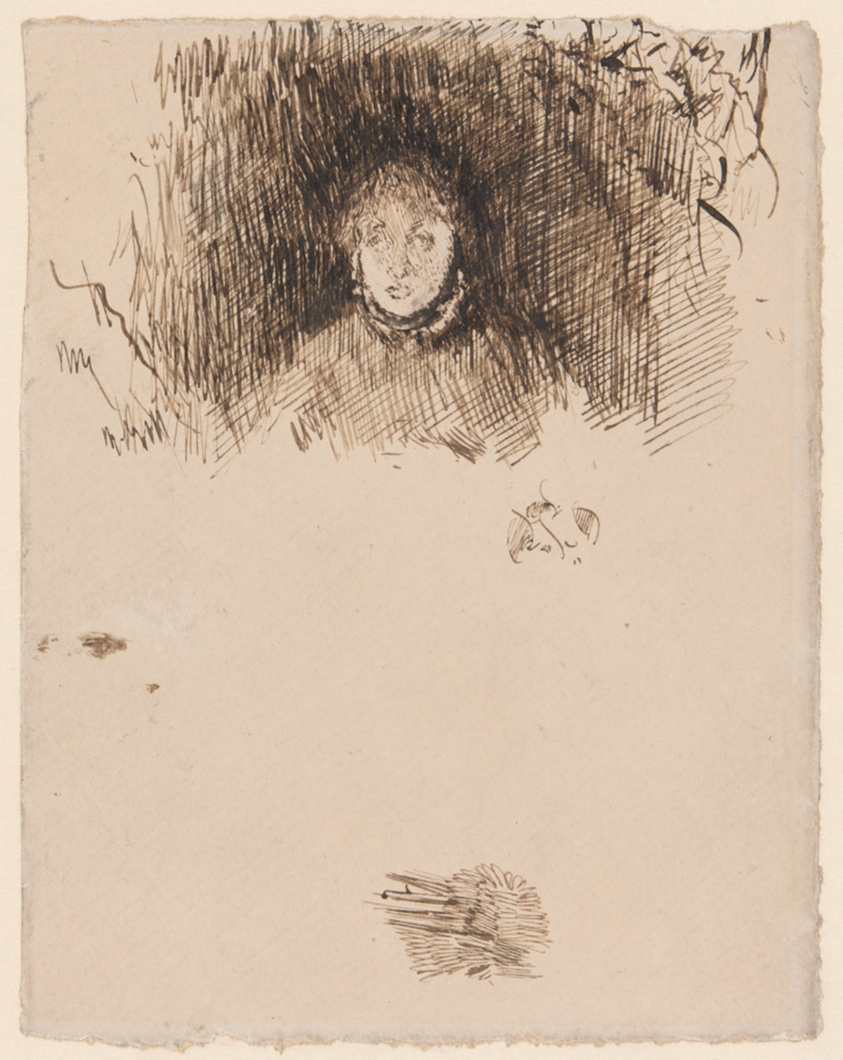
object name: Drawing and Watercolor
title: Head of a Girl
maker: James McNeill Whistler (American, 1834-1903)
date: c. 1882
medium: Pen and brown ink with scraping on cream laid paper laid down on ivory board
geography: United States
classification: pen and ink drawings; drawings (visual works); prints and drawing; paper